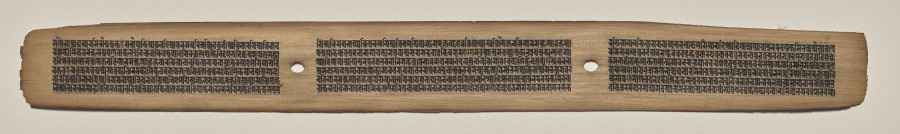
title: Text, Folio 31 (recto), from a Manuscript of the Perfection of Wisdom in Eight Thousand Lines (Ashtasahasrika Prajnaparamita-sutra)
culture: Eastern India, Bihar, Vikramashila Monastery. Painting: Nepal, Kathmandu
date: Sunday, September 14, 1119 (year 239 of the Newar Samvat in the month of Ashvina)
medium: gum tempera and ink on palm leaves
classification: Painting